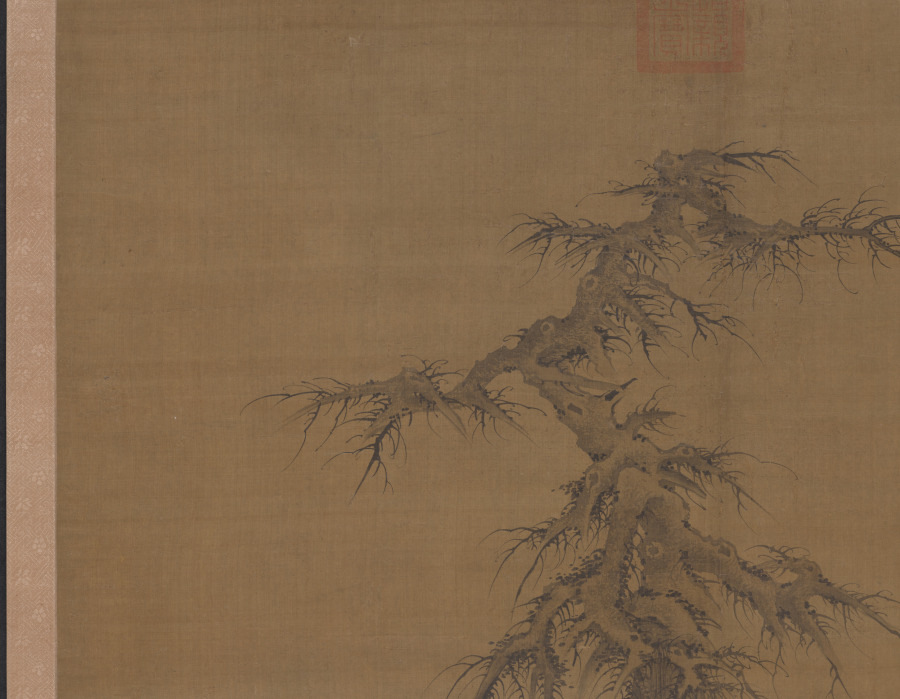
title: Old Trees by a Cool Spring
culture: China, Yuan dynasty (1271-1368)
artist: Li Shixing (Chinese, 1283–1328)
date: 1326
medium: hanging scroll; ink on silk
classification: Painting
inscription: 泰定丙寅年冬十二月薊丘李士行遵道作。[印] 李士行印; 李氏遵道; 遊戲翰墨.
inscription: 薊丘李侯能畫松，蟠根錯節騰蛟龍。 枯梢削鐵歲月古，細葉當風紫翠重。 昔人曾入子固夢，此株豈為秦官封。 畢宏韋偃偕已矣，請公放筆吾將從。 華溪九十翁沈夢麟書 蘊中上人題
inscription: [印] 明善堂所見書畫印記; [印] 怡親王寶